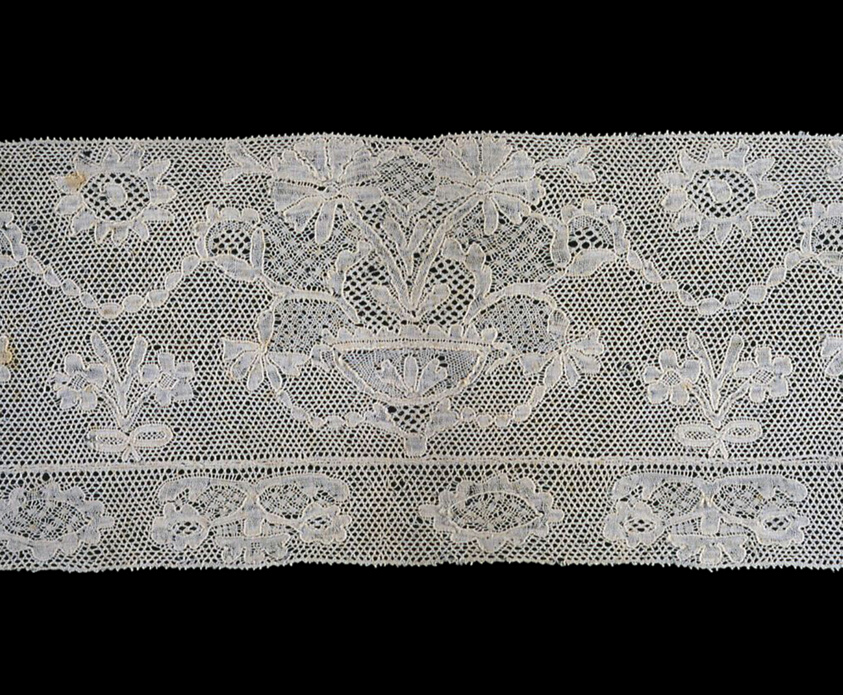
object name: Textile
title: Border (Fragment)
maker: Belgium, Flanders, Antwerp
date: 1750/1800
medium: Cotton and linen, bobbin straight lace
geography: Flanders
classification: textile; lace - bobbin; lace